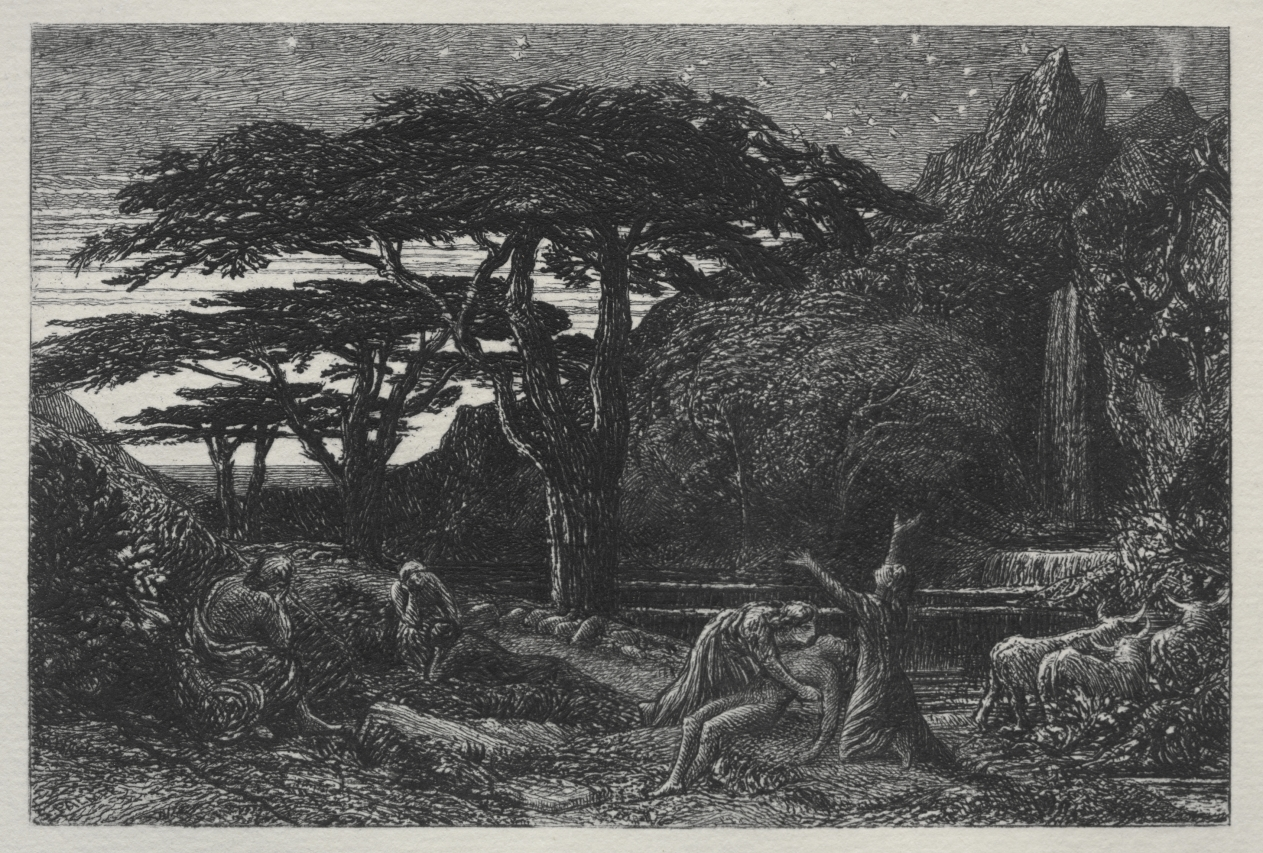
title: The Cypress Grove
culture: England, 19th century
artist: Samuel Palmer (British, 1805–1881)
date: 1883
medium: etching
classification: Print